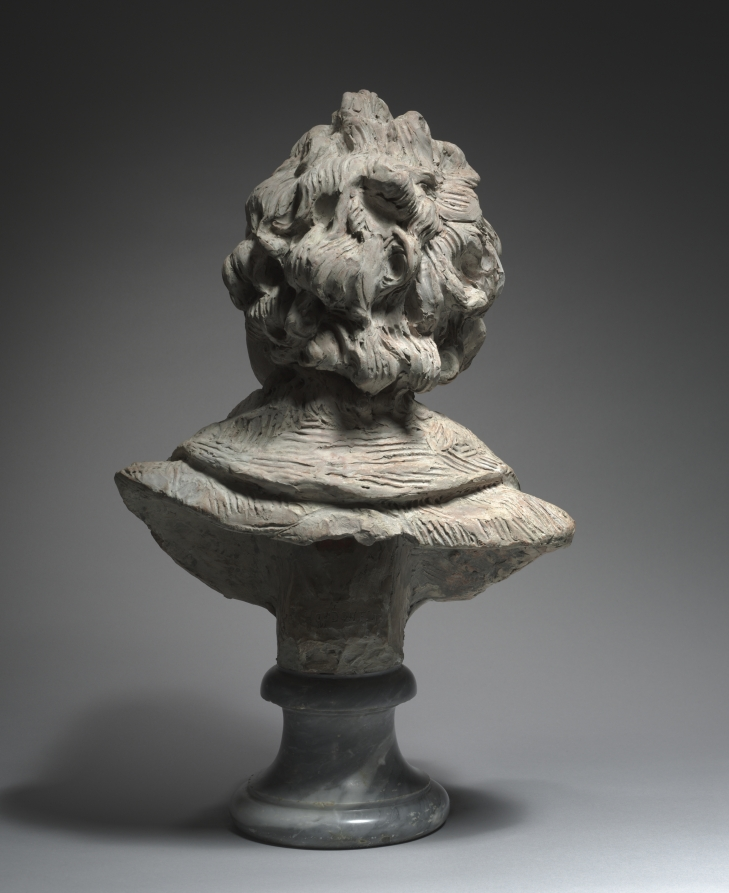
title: Portrait of Christoph Willibald Gluck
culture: France, 18th century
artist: Jean-Antoine Houdon (French, 1741–1828)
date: c. 1775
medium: terracotta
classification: Sculpture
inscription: inscribed in plaster fill in back at bottom: Houdon FT 177[4?]. Since this inscription was clearly added after the terracotta was fired, it cannot be considered a signature.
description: A well-known composer of the 1700s, Gluck reformed opera by bringing unprecedented simplicity and sincerity to his music and staging, qualities shared by Houdon’s bust. This portrait, by depicting Gluck’s pockmarked face, was perceived as a natural and truthful representation. Yet, he would never have appeared publicly with unkempt hair and an open collar, which constituted the standard for representing an artist.